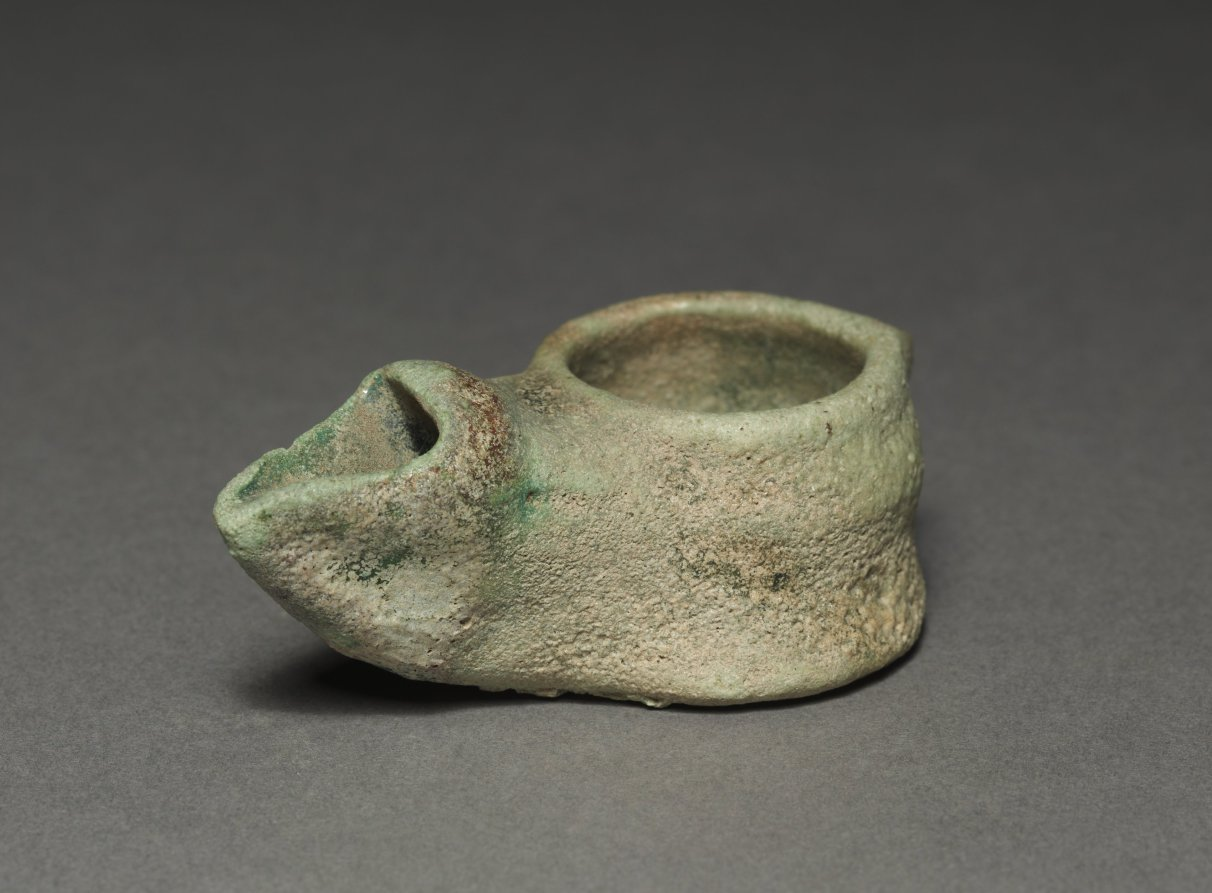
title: Lamp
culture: Parthian Empire (247 BCE–224 CE)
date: 1–200 CE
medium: terracotta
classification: Ceramic